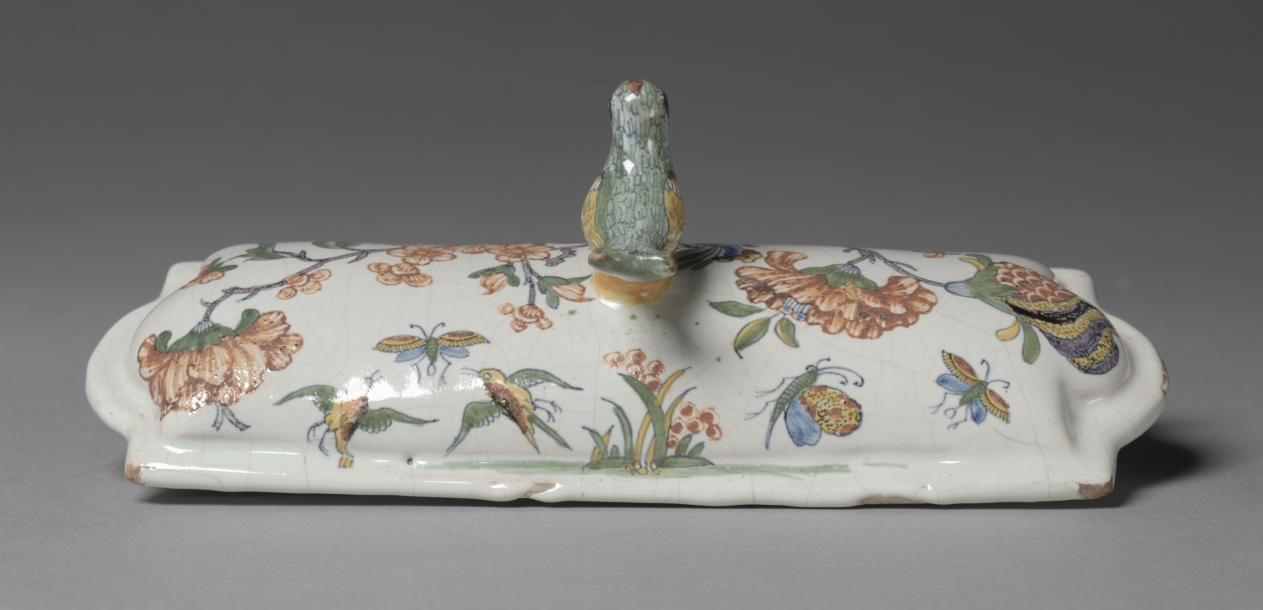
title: Writing Stand with Inkwells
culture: France, Sinceny, 18th century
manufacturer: Sinceny Factory (French)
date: 1746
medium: Tin-glazed earthenware (faience) with enamel decoration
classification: Ceramic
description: The faience factory at Sinceny was an offshoot of that at Rouen. In style, Sinceny closely resembles later Rouen wares with polychrome decoration. The stylized flowers and insects which decorate this writing stand are entirely typical of Sinceny faience.